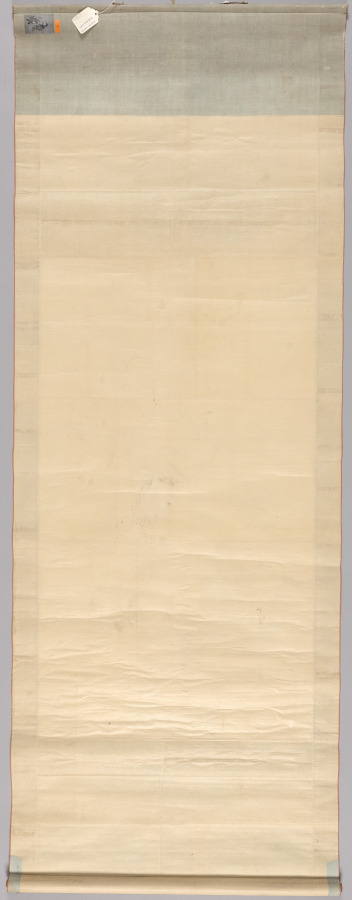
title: Mother and Sons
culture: China, Qing dynasty (1644–1911), Qianlong reign (1736–95)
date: 1736–95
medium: Hanging scroll; polychrome woodblock print; ink and color on paper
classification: Print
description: Woodblock printing in color reached its height in China in the 1600s to 1700s. It was executed by means of sets of separate blocks, each carved to print a different color.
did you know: In the 1600s, printing flourished in such Jiangnan cities as Nanjing, Suzhou, Hangzhou, and Huizhou, evolving from privately enjoyed illustrated books printed in color to more commercialized single-sheet color prints that were hung on walls and became part of the rich urban visual culture.